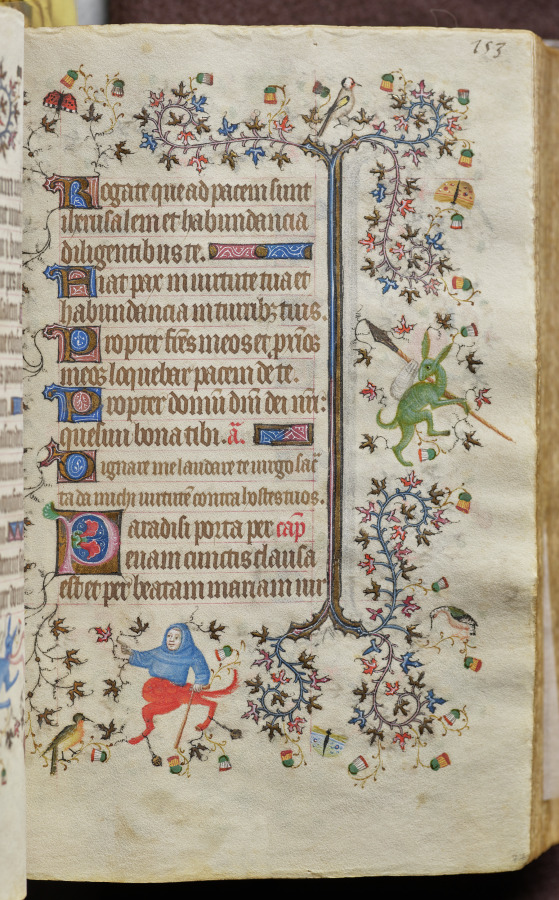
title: Hours of Charles the Noble, King of Navarre (1361-1425): fol. 77r, Text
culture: France, Paris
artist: Master of the Brussels Initials and Associates (French)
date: c. 1405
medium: ink, tempera, and gold on vellum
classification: Bound Volume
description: This precious volume was obviously highly prized by its owner, the French-born King of Navarre, who had his coat of arms painted on no less than twenty folios. Rather than directly commissioning this manuscript from a specific workshop, it seems that Charles the Noble acquired his book of hours -- perhaps ready-made for the luxury market -- while on a trip to Paris in 1404-05. A collaborative effort, six painting styles are evidenced within the pages of this codex, those of two Italians, two Frenchmen, and two Netherlanders. The painter who was responsible for the planning and decoration of the book, and who produced seventeen of the large miniatures, was a Bolognese artist known as the Master of the Brussels Initials. His principal assistant, responsible for most of the borders, was a Florentine who signed his name "Zecho" da Firenze on folio 208 verso.